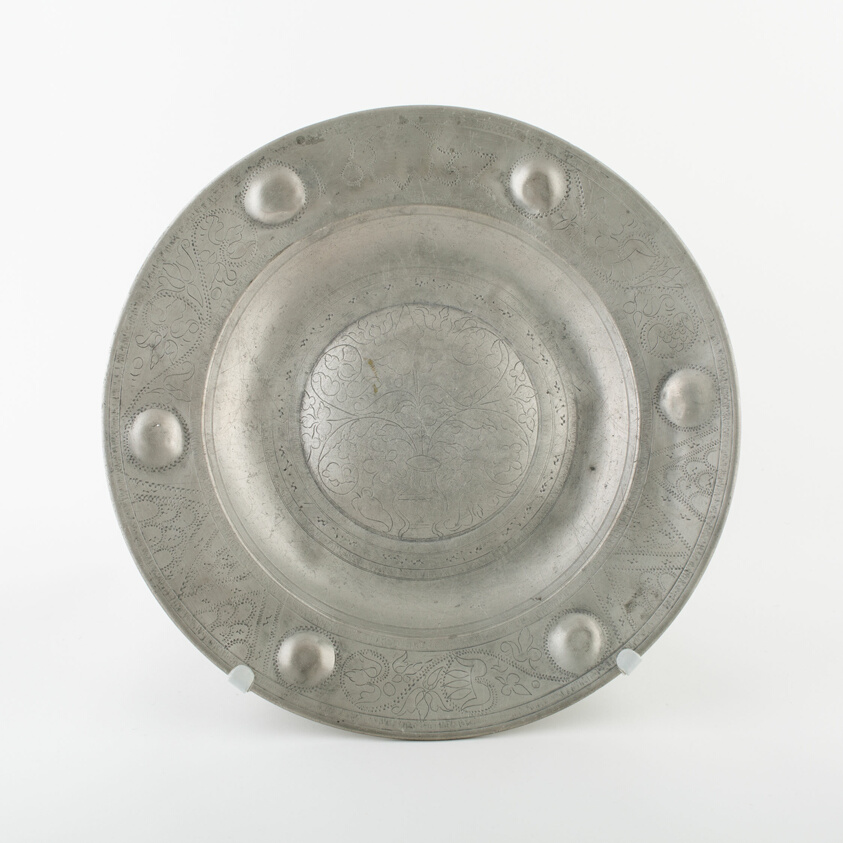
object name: Metalwork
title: Charger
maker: Balthasar Dauman; German, active 1623-1632; Glatz, Germany (now Kłodzko, Poland)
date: 1632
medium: Pewter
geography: Klodzko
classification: plate (general, dish); pewter; dish (vessel); metalwork; european decorative arts